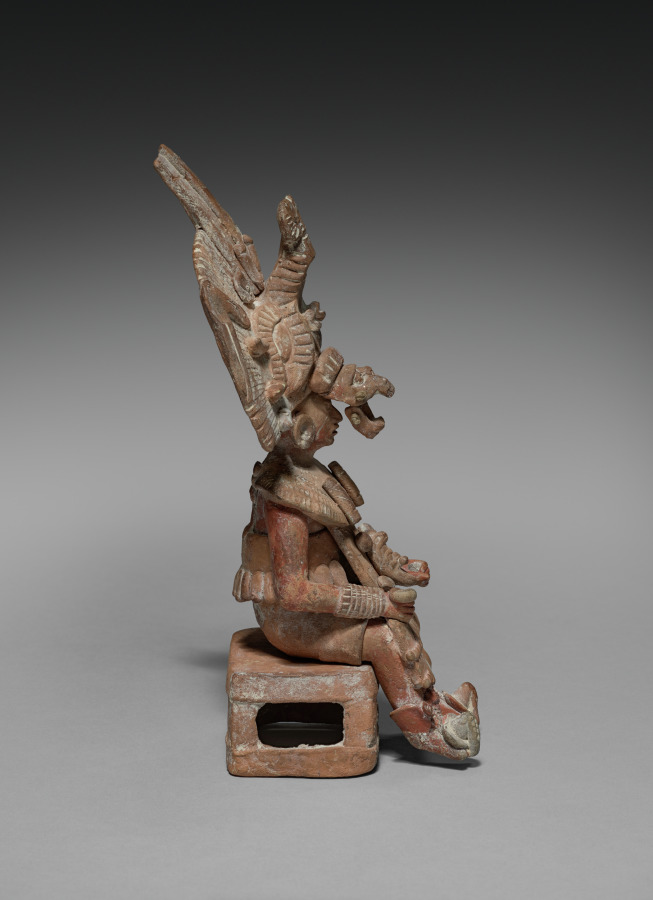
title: Seated Lord with Removable Headdress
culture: Mesoamerica, Maya, probably Jaina Island, Late Classical period, 7th-9th century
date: 600–800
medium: ceramic and slip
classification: Ceramic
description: The major Maya grave offerings on Jaina Island were ceramic figurines that depict deities and humans in a variety of roles. The standing figure represents a warrior who once probably held weapons and wears either quilted cotton armor or the feathered uniform of a military order. The seated figure also represents a male, perhaps another warrior, who wears a huge zoomorphic headdress. A skeletal face with articulated jaw descends from the headdress to fit as a mask over the figure’s face.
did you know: It is estimated that some 20,000 people were buried on the tiny island of Jaina over a 500-year period.